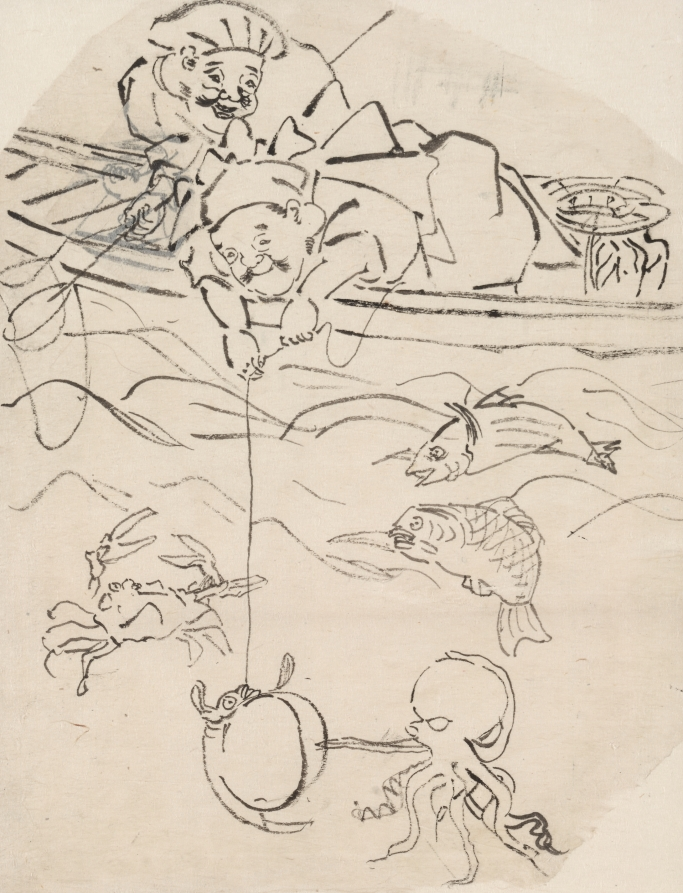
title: Daikoku and Ebisu, Two of the Seven Gods of Happiness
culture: Japan, Edo period (1615–1868)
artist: Utagawa Kuniyoshi (Japanese, 1797–1861)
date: c. 1830s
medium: ink on paper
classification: Drawing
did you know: The artist has used a small paper patch inked with a hand to change the hand position of the figure holding the net.